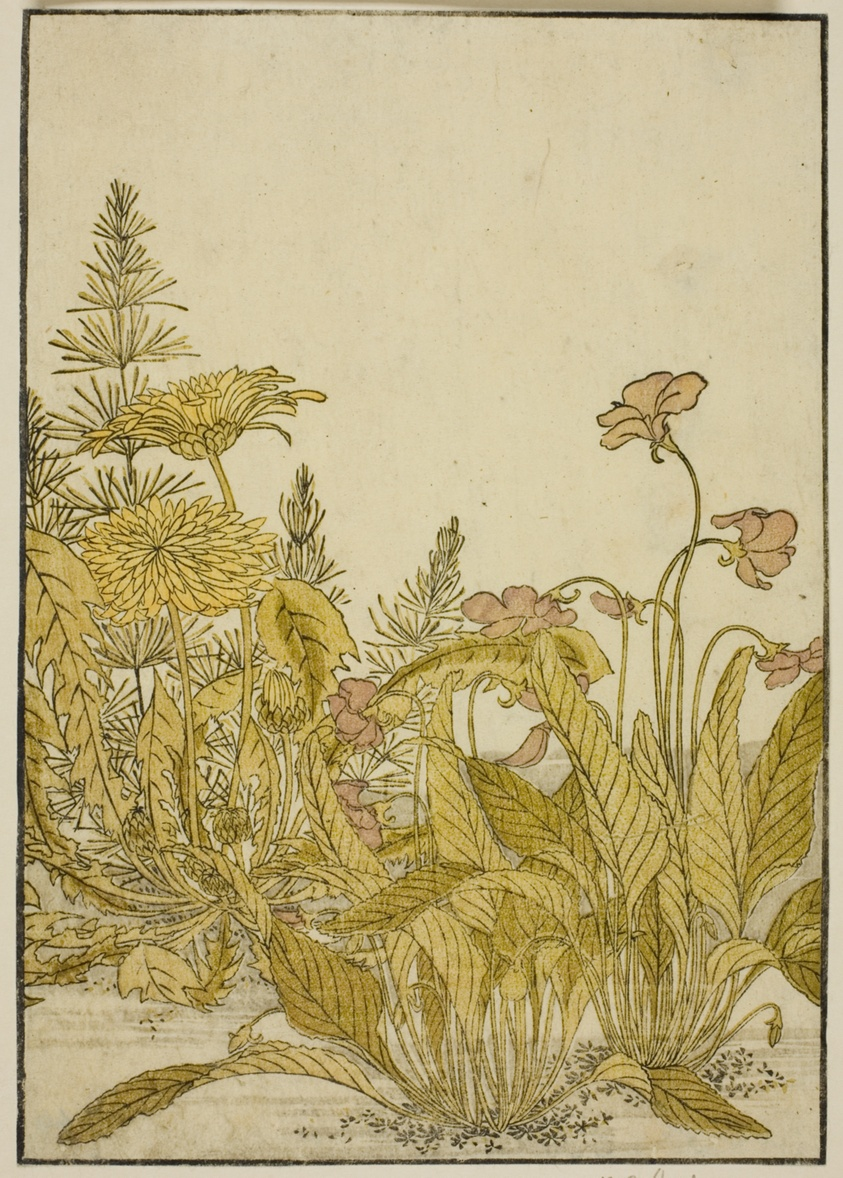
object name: Print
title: Spring Flowers: Violets and Dandelions, from the book "Mirror of Beautiful Women of the Pleasure Quarters (Seiro bijin awase sugata kagami)," vol. 1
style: Japanese (culture or style)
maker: Katsukawa Shunsho; Japanese, 1726-1792; Kitao Shigemasa; Japanese, 1739-1820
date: 1776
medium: Color woodblock print; single-page illustration cut from a book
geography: Japan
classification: woodblock print; print; asian art